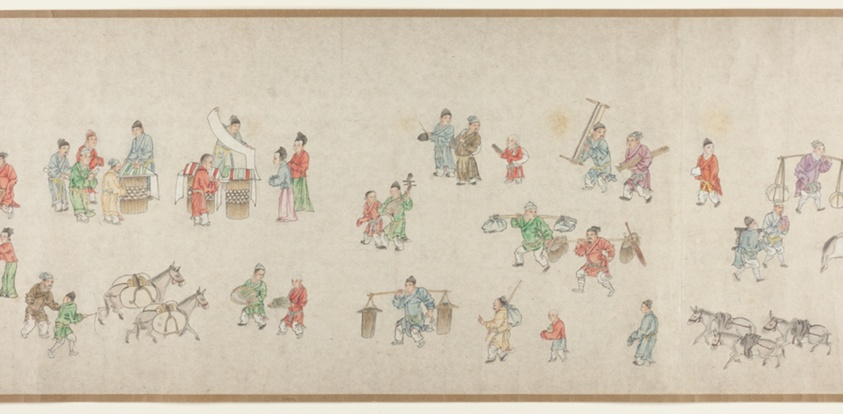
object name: Painting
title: Street Scenes in Times of Peace 太平風會圖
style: Chinese (culture or style)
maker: Zhu Yu (Zhu Junbi) 朱玉（朱君璧）; Chinese, 1293-1365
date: Yuan dynasty (1279–1368), 14th century 元朝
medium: Handscroll; ink and colors on paper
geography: China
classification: handscroll; painting; asian art